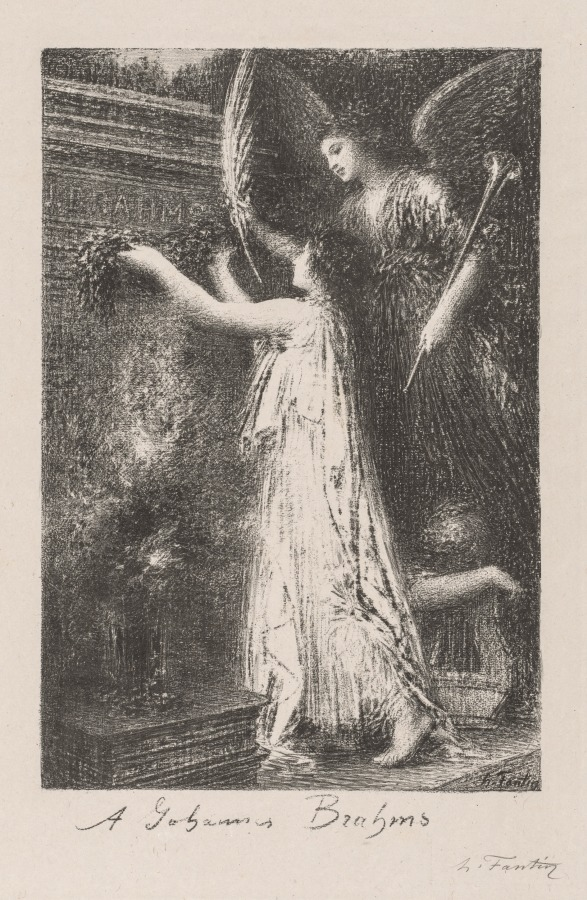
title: À Johannes Brahms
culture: France, early 20th Century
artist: Henri Fantin-Latour (French, 1836–1904)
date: 1900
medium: lithograph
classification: Print